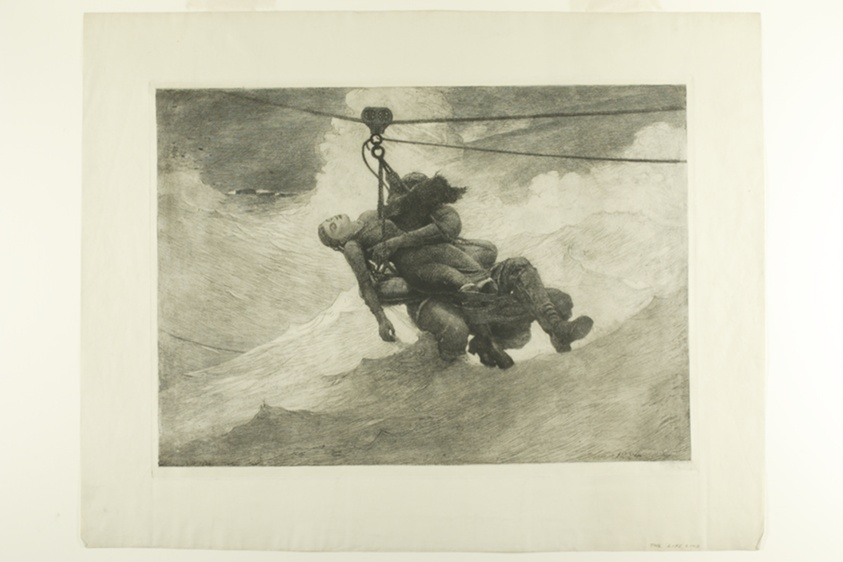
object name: Print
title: The Life Line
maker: Winslow Homer (American, 1836-1910)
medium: Etching on cream laid paper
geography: United States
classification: etching; print; prints and drawing